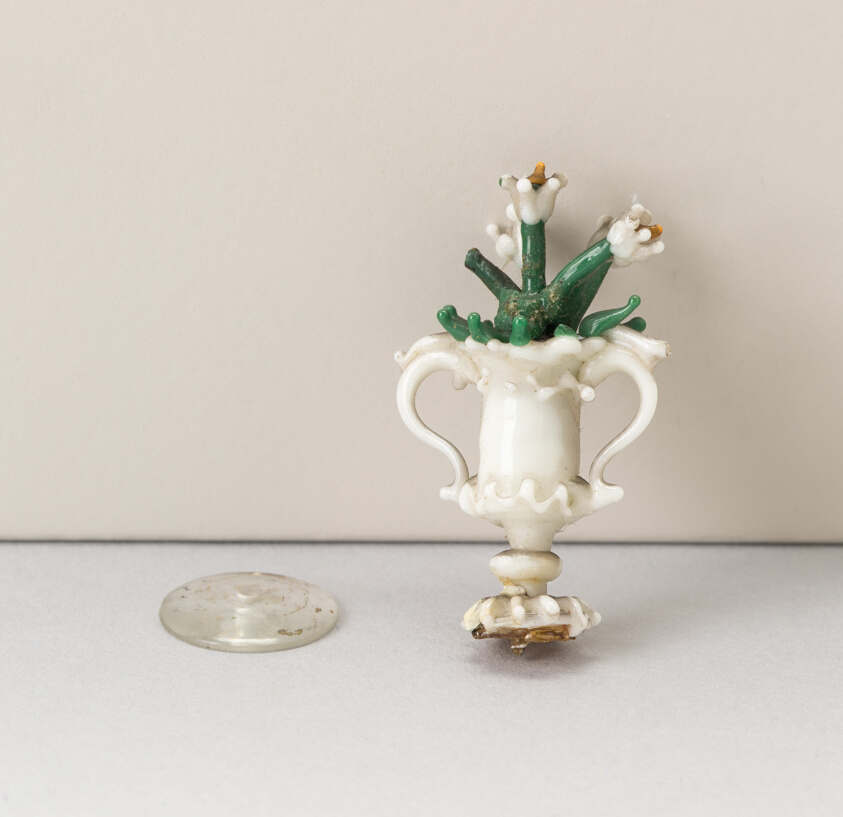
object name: Glass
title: Urn with Flowers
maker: Nevers, France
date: 18th century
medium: Glass; lampwork (verre de Nevers), metal armature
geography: France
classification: decorative object/ornament; lampwork; glass; european decorative arts